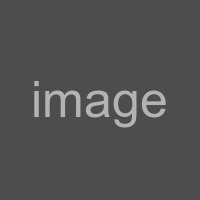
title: Agra. The Fort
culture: India, 19th century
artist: Photoglob Co. (Zurich, active c. 1890–1910)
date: 1890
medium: Photochrom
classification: Photograph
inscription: Imprinted in gold on recto in lower left corner: “20027. P.Z.-AGRA. THE FORT.”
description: Known as the Red Fort because of the rosy sandstone used to build it; the fort was a walled city that served as home to the Mughal emperors until 1638. The height and massiveness of the walls are emphasized by the inclusion of the Indian travelers resting in the foreground.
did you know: It took 1,444,000 builders eight years to build the sandstone fort, which was completed in 1573.